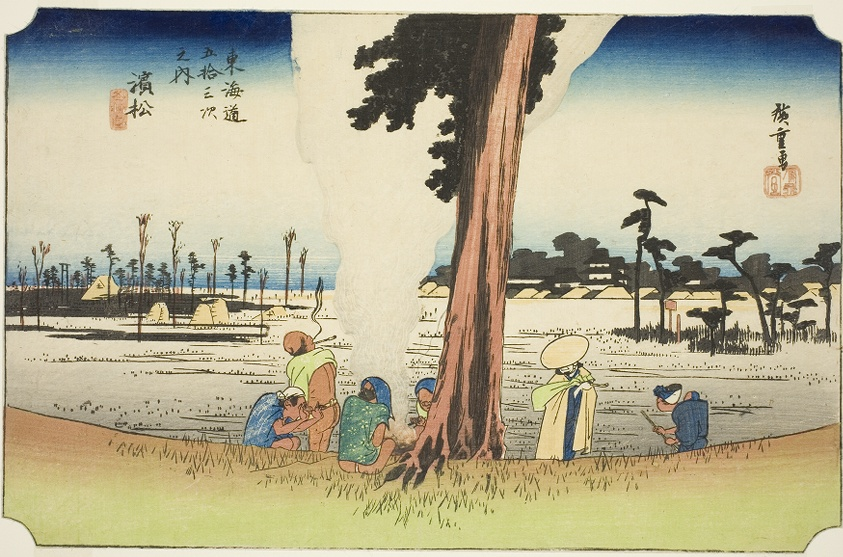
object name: Print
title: Hamamatsu: Winter Scene (Hamamatsu, fuyugare no zu), from the series "Fifty-three Stations of the Tokaido (Tokaido gojusan tsugi no uchi)," also known as the Hoeido Tokaido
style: Japanese (culture or style)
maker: Utagawa Hiroshige 歌川 広重; Japanese, 1797-1858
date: c. 1833/34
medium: Color woodblock print; oban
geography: Japan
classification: woodblock print; print; asian art